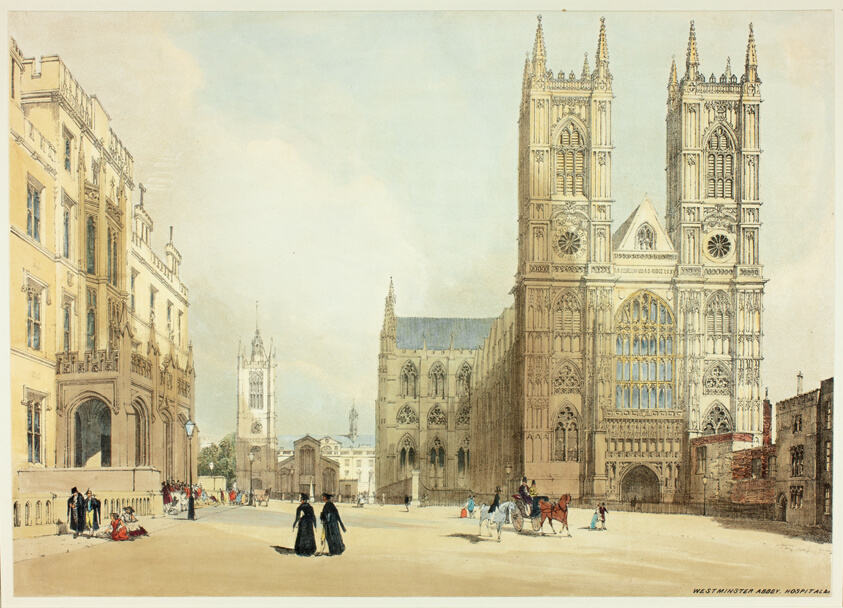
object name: Print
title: Westminster Abbey, Hospital and Company, plate seven from Original Views of London as It Is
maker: Thomas Shotter Boys (English, 1803-1874); designed by Charles Ollier (English, 1788-1859)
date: 1842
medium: Hand-colored lithograph on paper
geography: England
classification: lithograph; print; prints and drawing